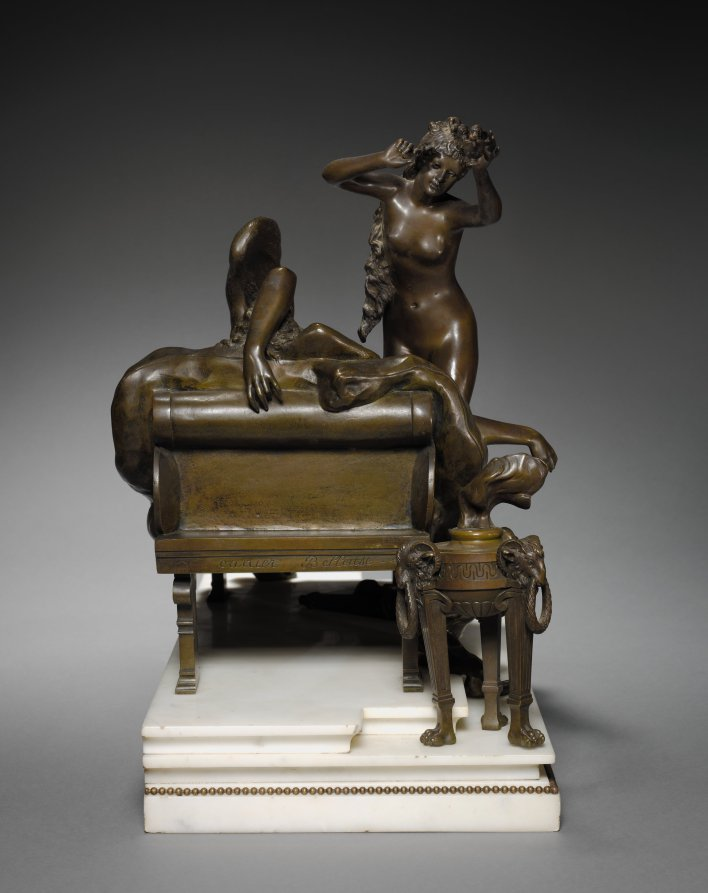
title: Cupid and Psyche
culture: France, 19th century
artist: Albert-Ernest Carrier-Belleuse (French, 1824–1887)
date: c. 1870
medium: bronze with marble base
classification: Sculpture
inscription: signed in ligature on edge of couch at head: "Carrier Belleuse."